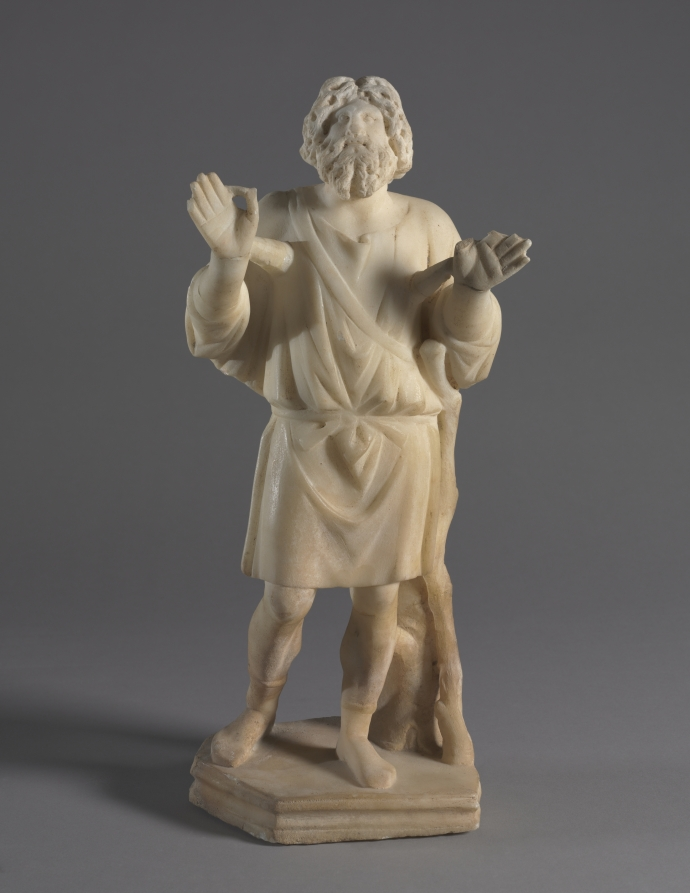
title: Jonah Praying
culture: Anatolia, late Roman-early Christian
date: 280–90 CE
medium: marble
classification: Sculpture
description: The Old Testament prophet Jonah is shown with his hands raised in prayer. It is unclear which moment of the biblical story of Jonah is depicted here. He may be praying in the belly of the sea monster. He might likewise be pleading with the Lord for the city of Nineveh’s destruction or lamenting the withering of the gourd beneath which he sought shelter after fleeing Nineveh.